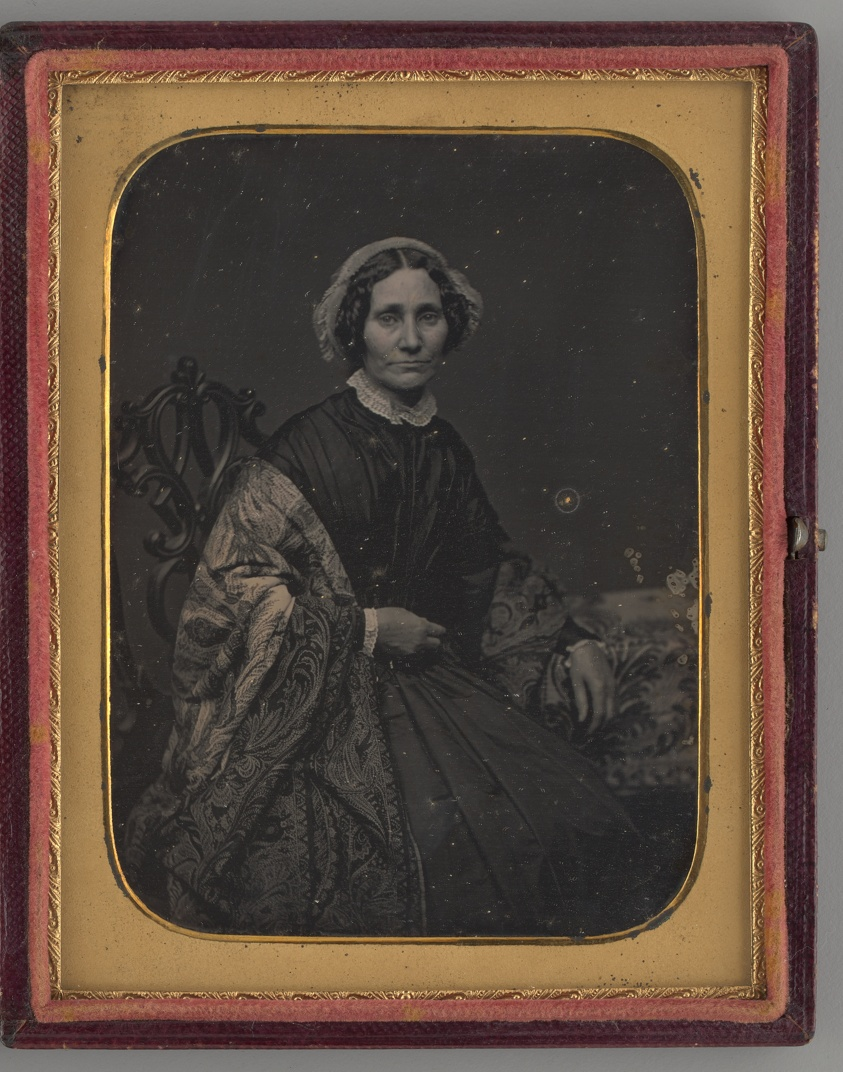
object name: Photograph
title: Untitled (Portrait of Seated Woman)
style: 19th century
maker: Unknown maker; American, 19th century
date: 1860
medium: Daguerreotype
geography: United States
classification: portrait; photograph; photographic process; photography; portrait; daguerreotype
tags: lundberg collection, portrait, woman, portraits, portraits: female subject